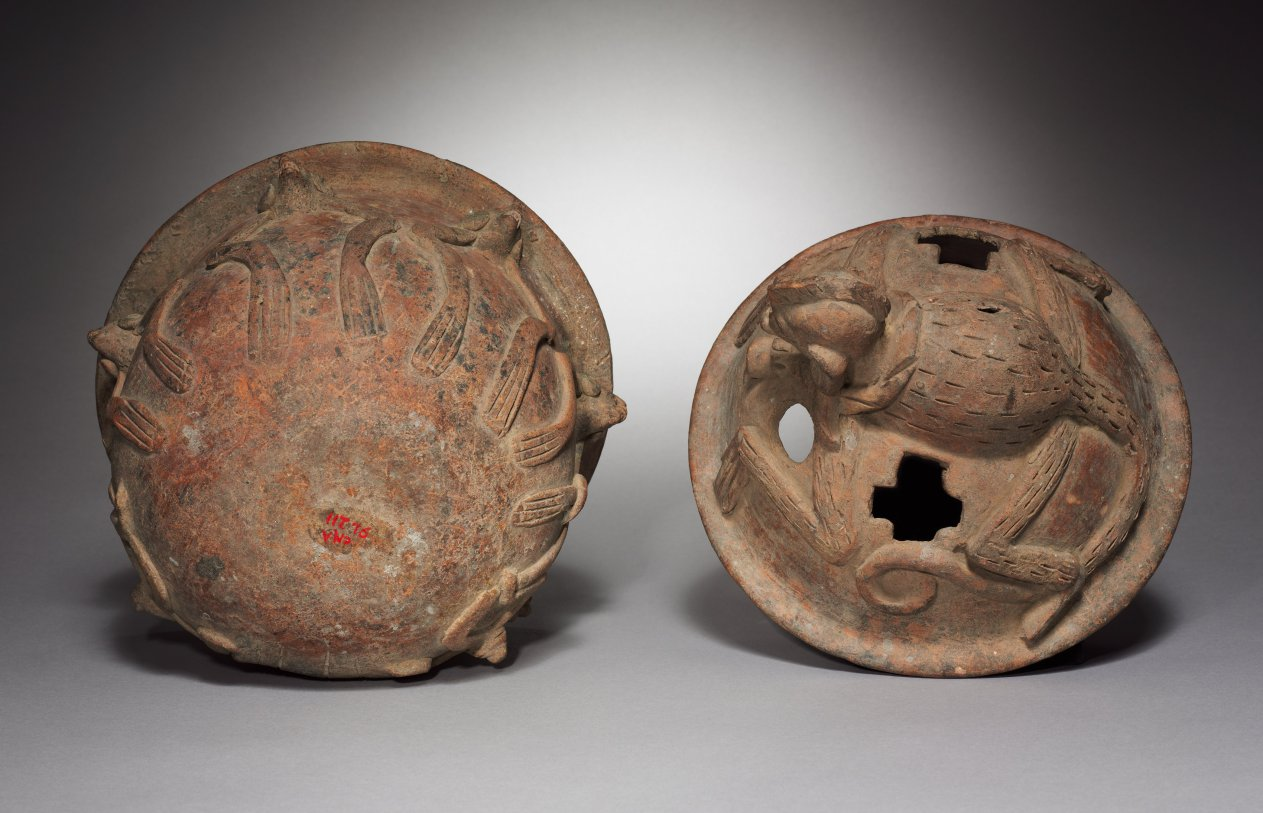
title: Incense Burner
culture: Guatemala, Quiché, San Juan Cotzal, Maya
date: 600–1000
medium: pottery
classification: Ceramic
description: According to the Popol Vuh, a sixteenth-century Quiché Maya manuscript, the world has been created and destroyed twice, and we now live in the third creation. In the second creation, human beings were made from wood and reeds. They lacked souls and minds, and they did not revere their creator. Because of these imperfections, most were killed by an uprising of utensils and domestic animals. Monkeys are the descendents of the survivors.